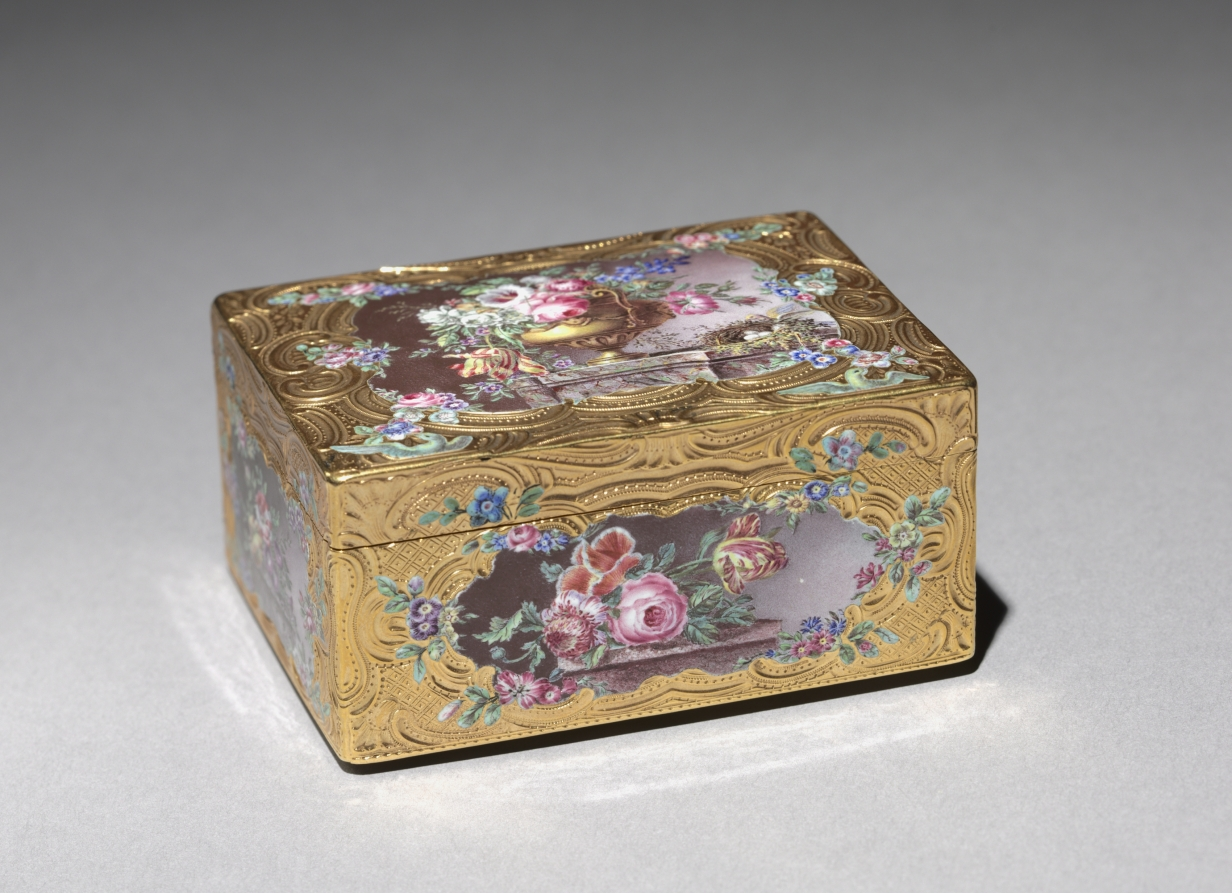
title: Snuff Box (Tabatière)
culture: France, 18th century (style of Louis XV)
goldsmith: Francois Guillaume Tiron (French)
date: 1756–57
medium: gold and enamel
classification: Miscellaneous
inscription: [Maker's mark of Francois-Guillaume Tiron, master goldsmith in 1747, inside cover; left wall]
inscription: [Warden's mark for Paris, 1756-1757, inside cover]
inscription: [Charge mark of Julien Berthe, Paris, 1750-1756, inside cover; left wall]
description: The miniature paintings that decorated snuff boxes were depicted in intricate detail requiring complex technical skill. This box’s miniatures are painted with enamel en plein, meaning the enamel has been applied directly to the metal of the box. A different enameling technique, basse-taille, is used to depict the doves and floral borders. Here, the gold has been chiseled away and filled with translucent enamel in order to produce a three-dimensional effect.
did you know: In the mid-1700s François-Guillaume Tiron worked alongside his brother, Jean-Marie Tiron, one of the most celebrated makers of gold boxes of the 18th century.